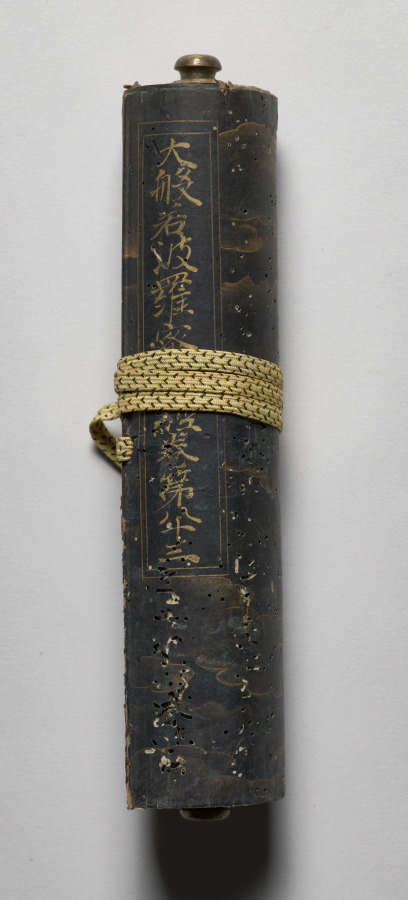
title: Volume from the Great Perfection of Wisdom Sutra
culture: Japan, Heian period (794–1185)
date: late 1100s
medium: Handscroll; ink and gold on dyed paper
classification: Manuscript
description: This scroll is part of the 600-volume Great Perfection of Wisdom Sutra. The sacred text addresses the perfection of wisdom and the nonsubstantiality of all phenomena, or the emptiness of all things. It takes the form of Shakyamuni Buddha’s preaching at four locations. This scroll is from the Perfection of Wisdom in 100,000 Lines, which occupies the first 400 volumes. At one time, religious clergy kept all the scrolls in a lacquered wood repository. They are now too fragile to open and we will conserve them over time.